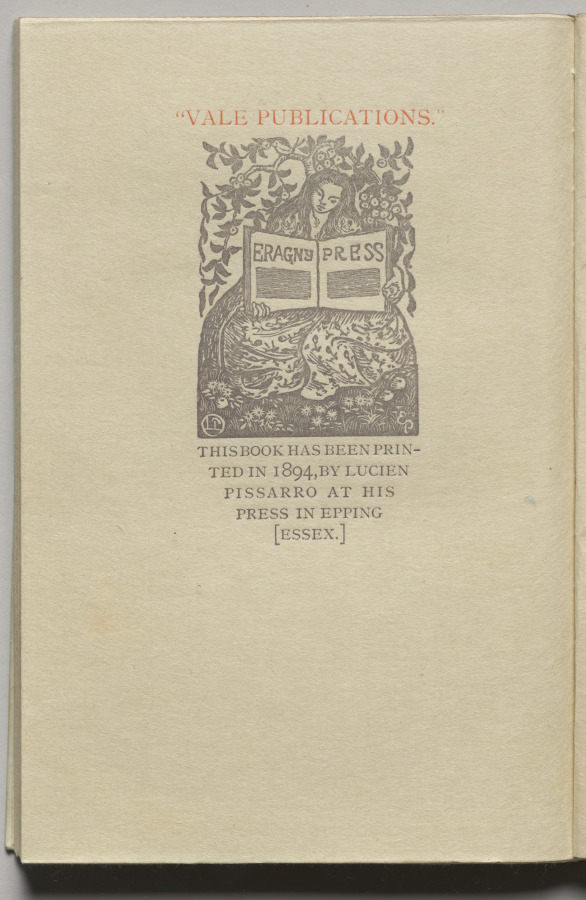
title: The Queen of the Fishes: Plate 13 (colophon)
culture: England, 19th century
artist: Lucien Pissarro (British, 1863–1944)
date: 1894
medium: woodcut printed in gray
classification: Bound Volume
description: Pissarro, son of the French Impressionist artist Camille Pissarro, moved to England in 1890. By 1894 he and his wife, Esther Bensusan Pissarro, had bought a printing press and established the Eragny Press. Influenced by William Morris, they were involved in every step of the production process: designing, cutting the woodblocks, setting type, and printing. The first book published by Ergany Press, The Queen of the Fishes, is based on an old fairy tale in which a peasant boy and girl escape the hardships of their lives by fantasizing that they have been turned into a giant oak and a splendid fish, respectively.